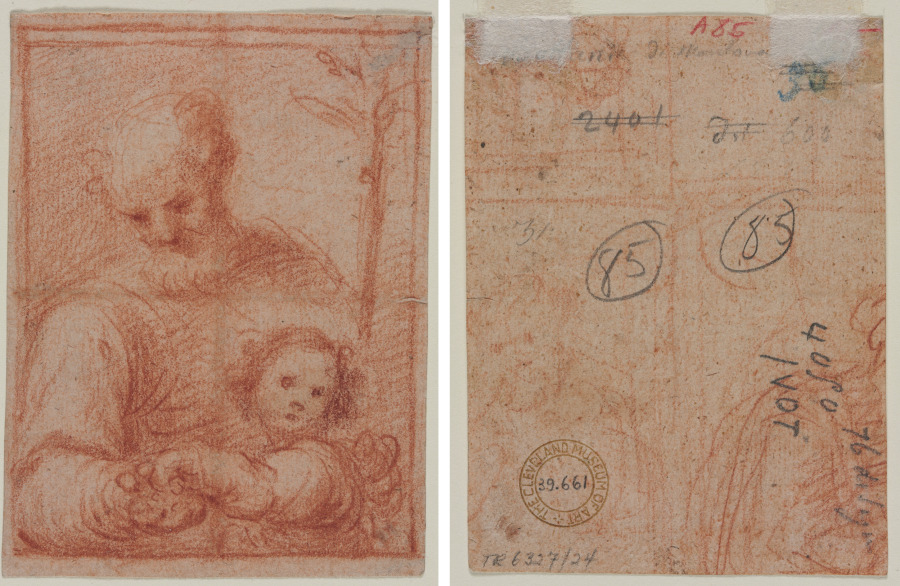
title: Joseph and Child (recto); Fragment of Two Figures (verso)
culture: Italy, 16th century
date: 16th century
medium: red chalk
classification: Drawing